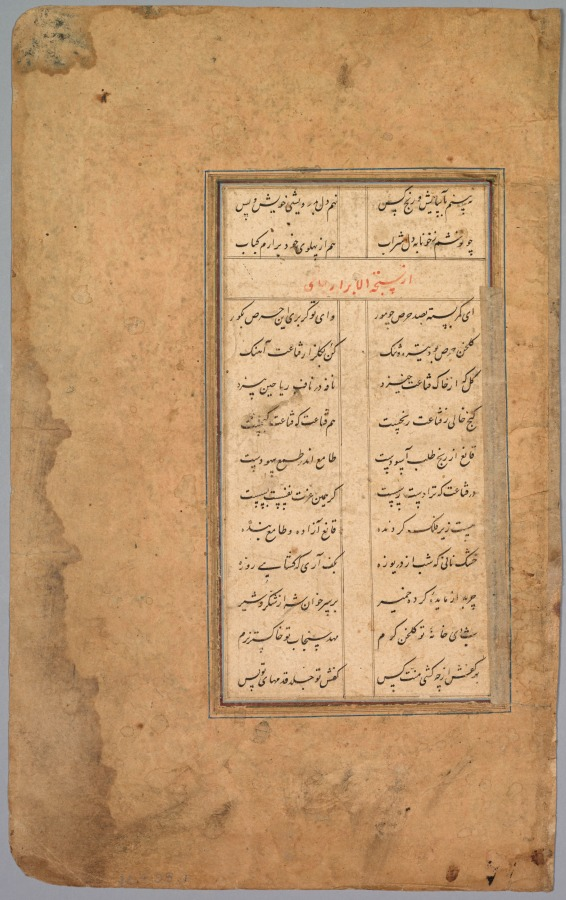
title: School Exercise Alphabet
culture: India, Mughal Dynasty (1526-1756)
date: 18th century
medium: ink on paper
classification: Manuscript